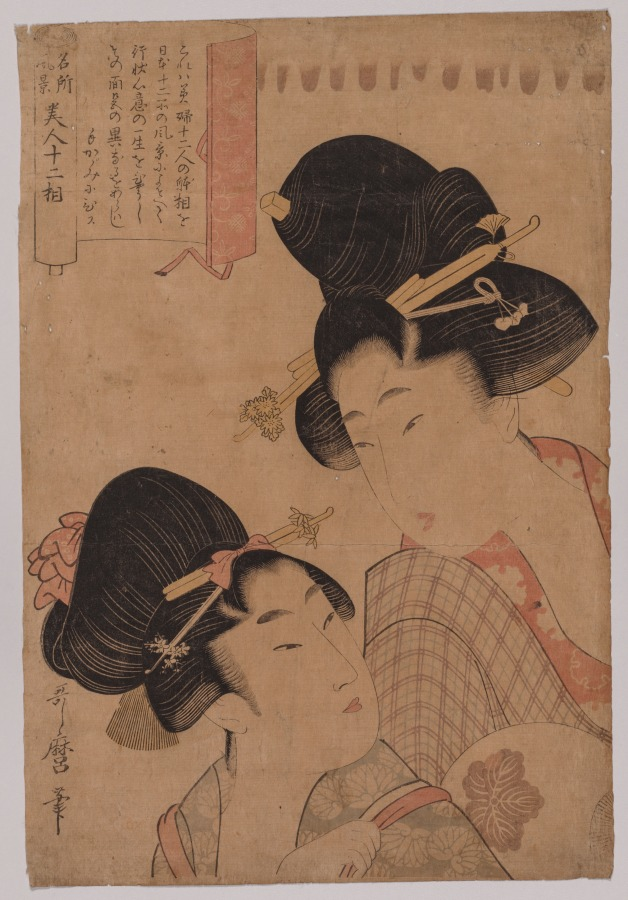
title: Two Courtesans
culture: Japan, Edo period (1615–1868)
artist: Kitagawa Utamaro (Japanese, c. 1754–1806)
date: 1753–1806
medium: color woodblock print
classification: Print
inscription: Signature: Utamaro fude